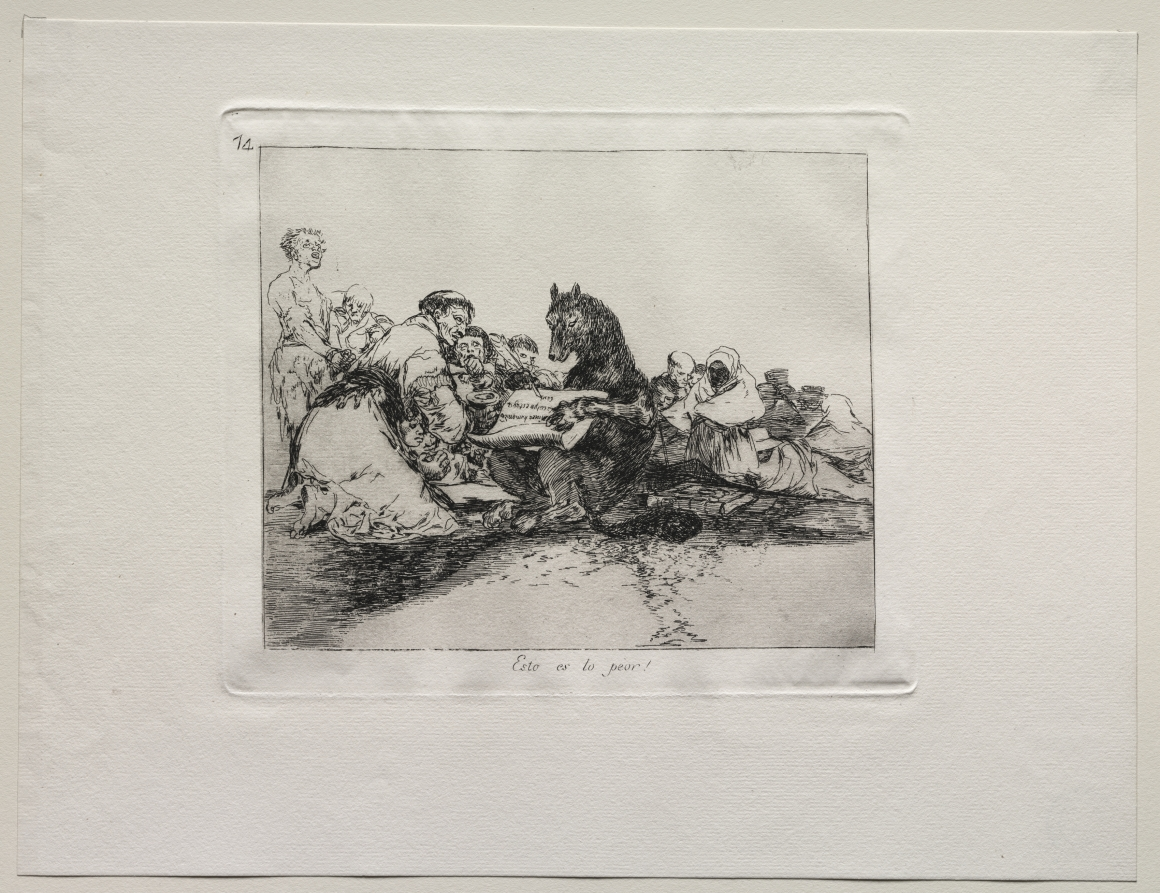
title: The Horrors of War: This is the Worst of it!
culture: Spain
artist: Francisco de Goya (Spanish, 1746–1828)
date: c. 1810–20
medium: etching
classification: Print